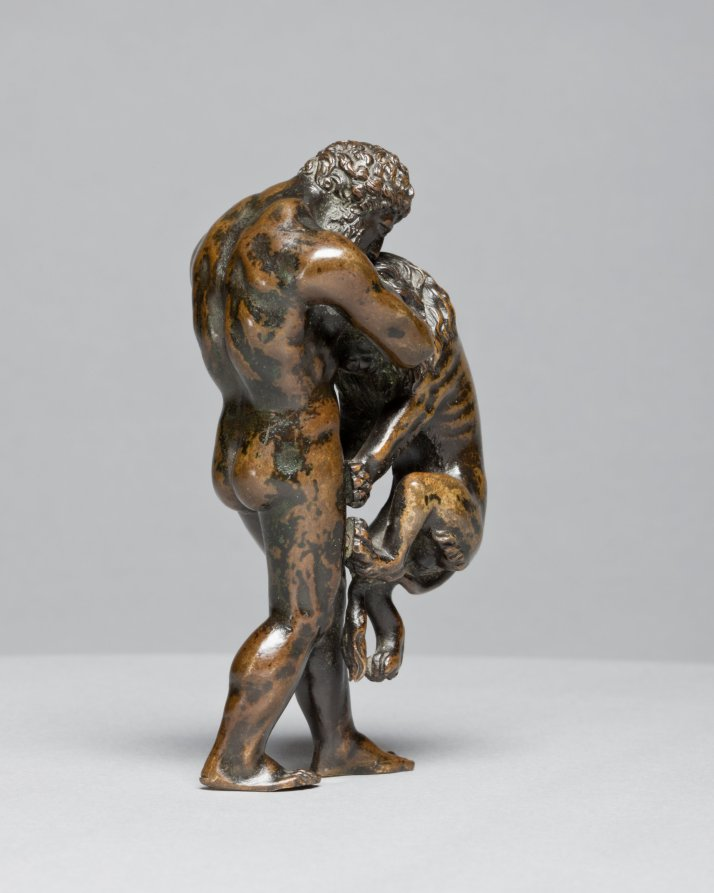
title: Hercules and the Nemean Lion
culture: Italy or France, 16th century or later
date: 1500s or later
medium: bronze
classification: Sculpture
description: The original owner of this work would have understood that this scene referred to the entire story of Hercules, the demi-god who had to accomplish twelve labors. The lion is named after the city of Nemea, near Corinth, a monstrous beast sent by the goddess Hera to wreak havoc on the area. After killing the lion, Hercules wore his pelt, commonly seen in other representations of the hero.